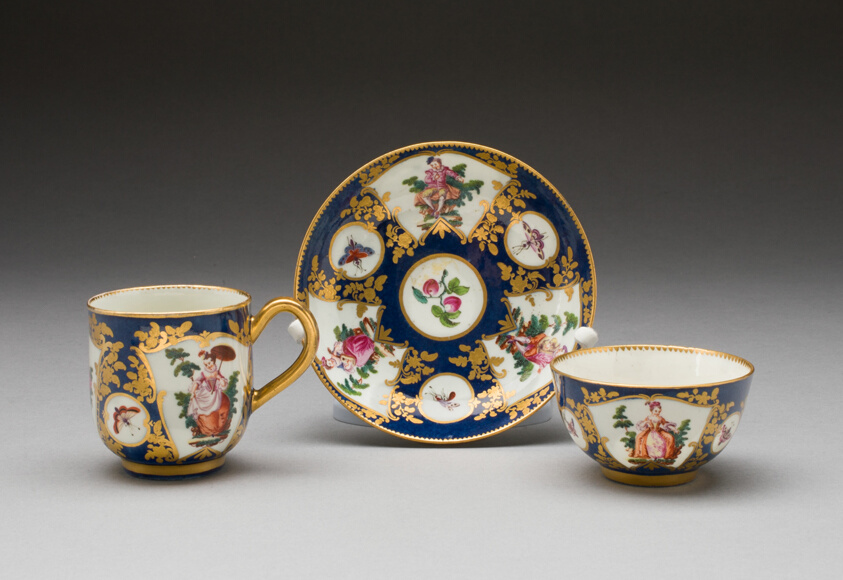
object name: Ceramics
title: Tea Bowl, Coffee Cup, and Saucer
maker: Worcester Porcelain Factory (Warmstry House Period, 1751–1783); Worcester, England, founded 1751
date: c. 1765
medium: Soft-paste porcelain with polychrome enamels and gilding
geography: Worcester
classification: drinking vessel; teaware; ceramics; porcelain; european decorative arts